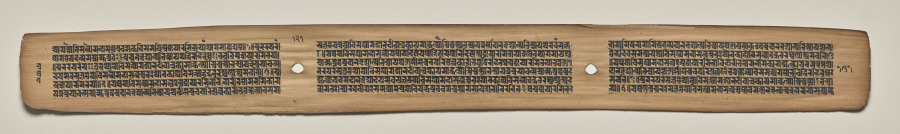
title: Text, Folio 121 (verso), from a Manuscript of the Perfection of Wisdom in Eight Thousand Lines (Ashtasahasrika Prajnaparamita-sutra)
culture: Eastern India, Bihar, Vikramashila Monastery. Painting: Nepal, Kathmandu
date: Sunday, September 14, 1119 (year 239 of the Newar Samvat in the month of Ashvina)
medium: gum tempera and ink on palm leaves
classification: Painting